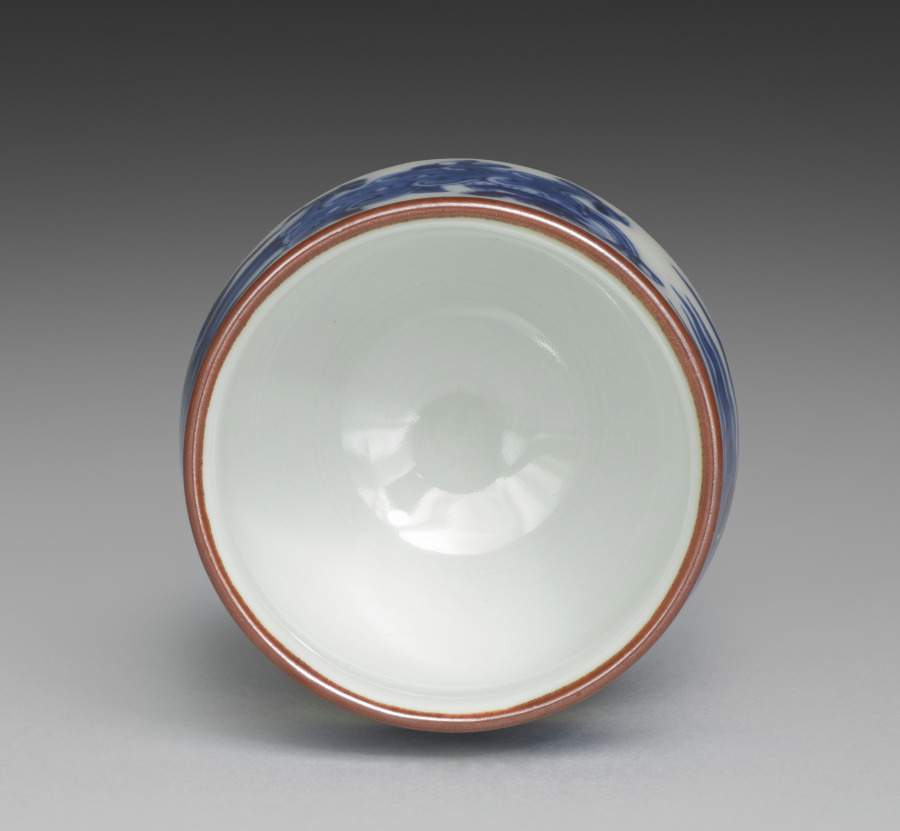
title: Cup from Sake Cups with Dragons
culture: Japan, Meiji period (1868–1912)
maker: Seifū Yohei III (Japanese, 1851–1914)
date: c. 1893–1914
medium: One from a set of six sake cups; porcelain with underglaze blue and iron oxide rims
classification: Ceramic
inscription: 大日本清風造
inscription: 清風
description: Each of these sake cups pictures two backward-looking dragons. The highly stylized creatures resemble jade carvings.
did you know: Seifū Yohei III was inspired by the Chinese mythical animals that were common on porcelain objects made at Jingdezhen in China during the Ming dynasty (1368–1644) and then exported around the world.